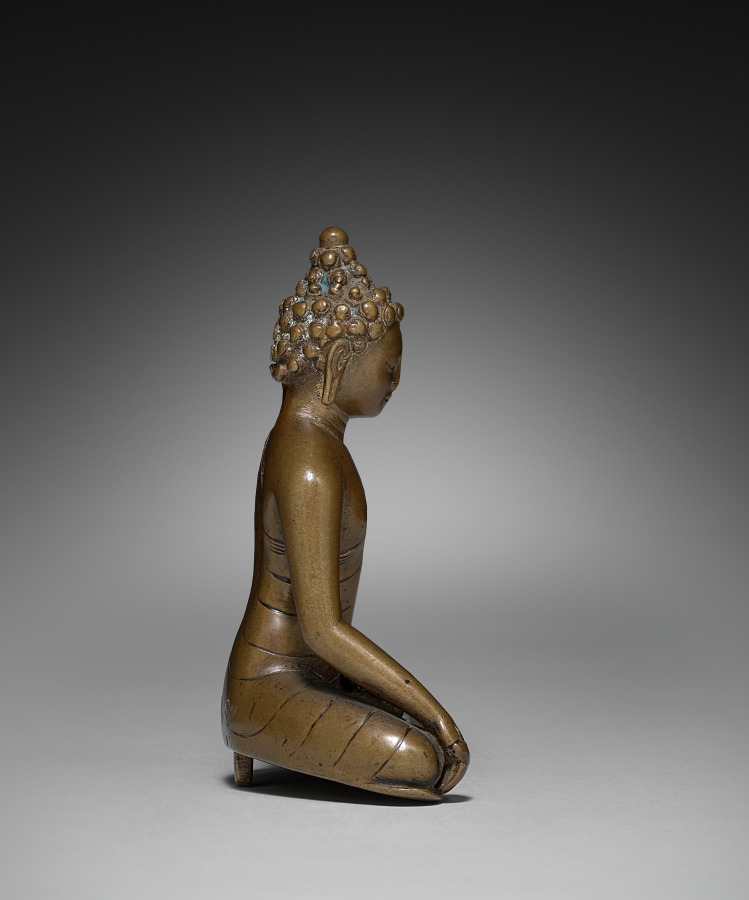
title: Seated Buddha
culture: India, Bengal(?), Pala period, 9th century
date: 800s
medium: bronze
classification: Sculpture